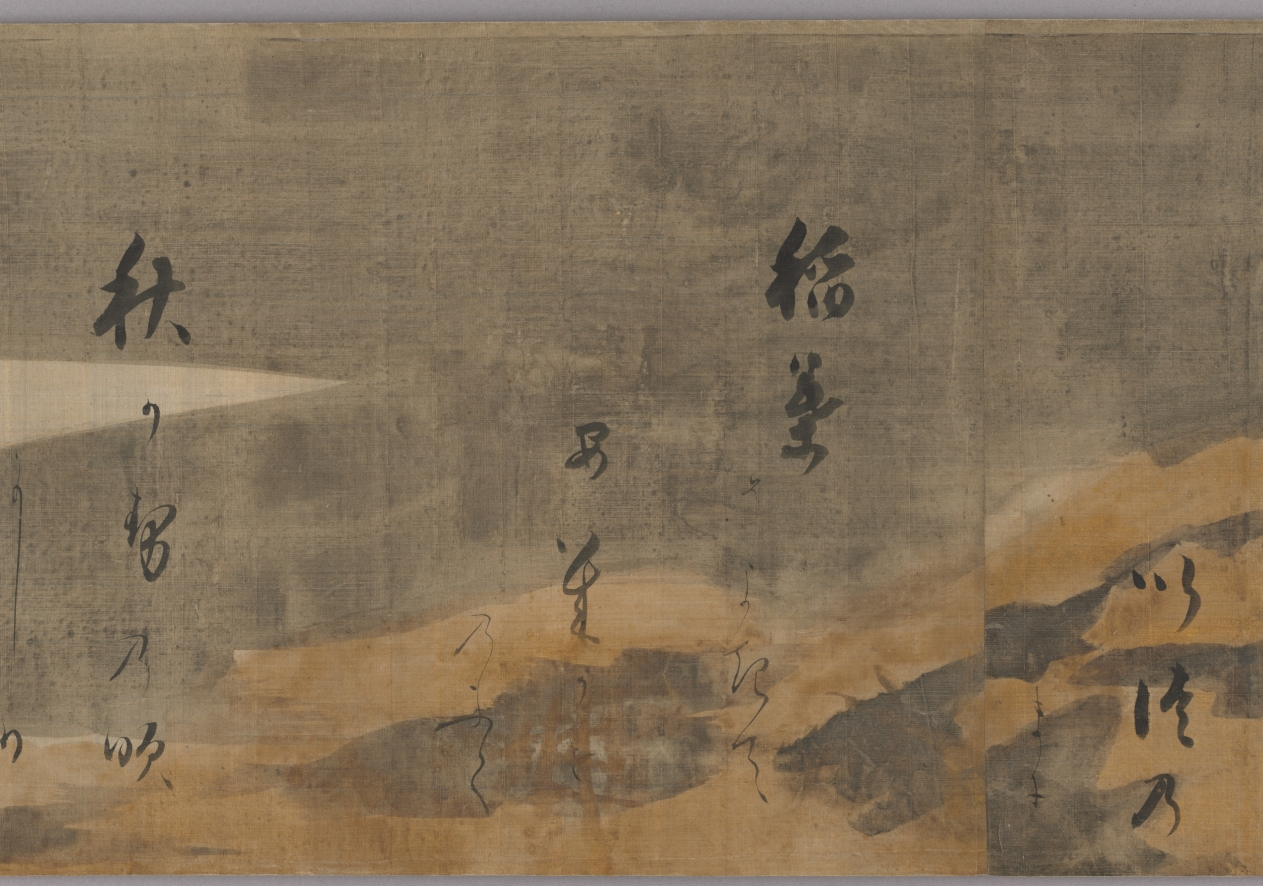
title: Selections from the Collection of Japanese Poems from Ancient and Modern Times (Kokin wakashū) with Design of Pines Along the Shore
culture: Japan, Momoyama period (1573-1615) to Edo period (1615-1858)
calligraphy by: Hon'ami Kōetsu (Japanese, 1558–1637)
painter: attributed to Tawaraya Sōtatsu (Japanese, c. 1570–c. 1640)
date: 1600s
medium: handscroll; ink on silk with gold and silver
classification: Calligraphy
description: The calligrapher and craftsman Hon’ami Kōetsu frequently collaborated with Tawaraya Sōtatsu, a painter who ran a studio that produced fans and screens. Sōtatsu’s work featured abstracted and flattened shapes, fields of color and gold, and asymmetry. In particular, motifs that appeared in small scale, such as flora and fauna, in early decorated Japanese papers were painted in a larger scale—blown up as if seen under a magnifying glass. For this handscroll, Kōetsu brushed poems from the autumn section of a poetry anthology onto silk with a landscape of pines in gold and silver likely painted by Sōtatsu.